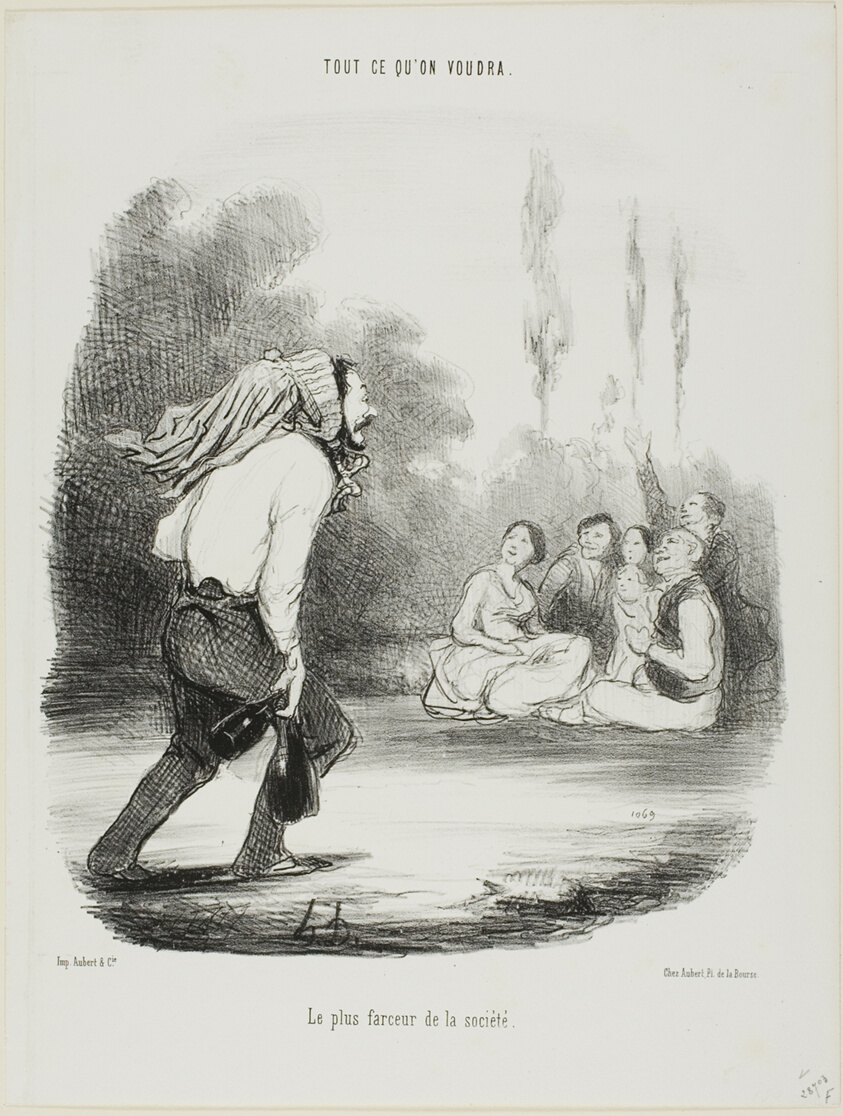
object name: Print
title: The Comedian of the Group, plate 13 from Tout Ce Qu'on Voudra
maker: Honoré Victorin Daumier; French, 1808-1879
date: 1847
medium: Lithograph in black on white wove paper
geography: France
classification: lithograph; print; prints and drawing